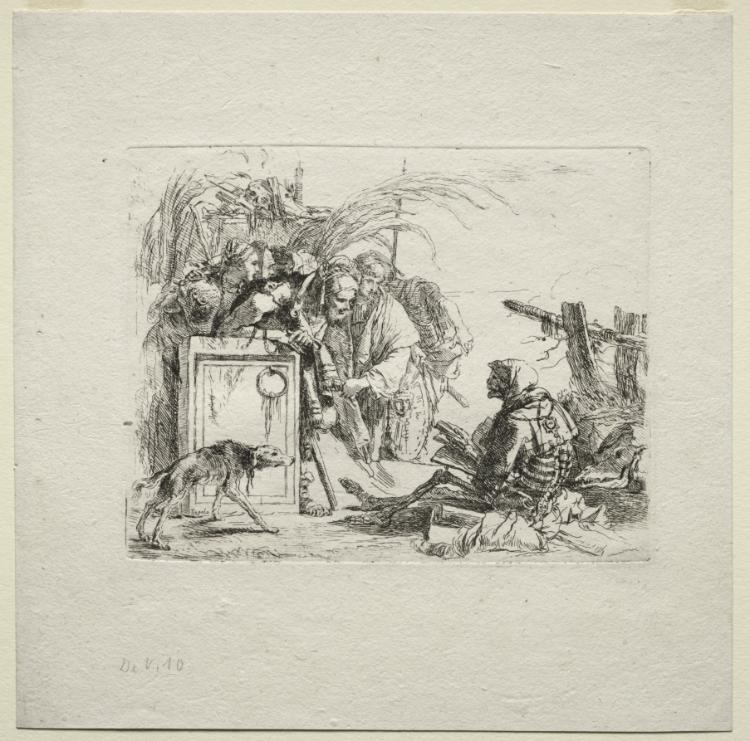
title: Various Caprices: Death Giving Audience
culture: Italy, 18th century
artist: Giovanni Battista Tiepolo (Italian, 1696–1770)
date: 1735–50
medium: etching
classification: Print